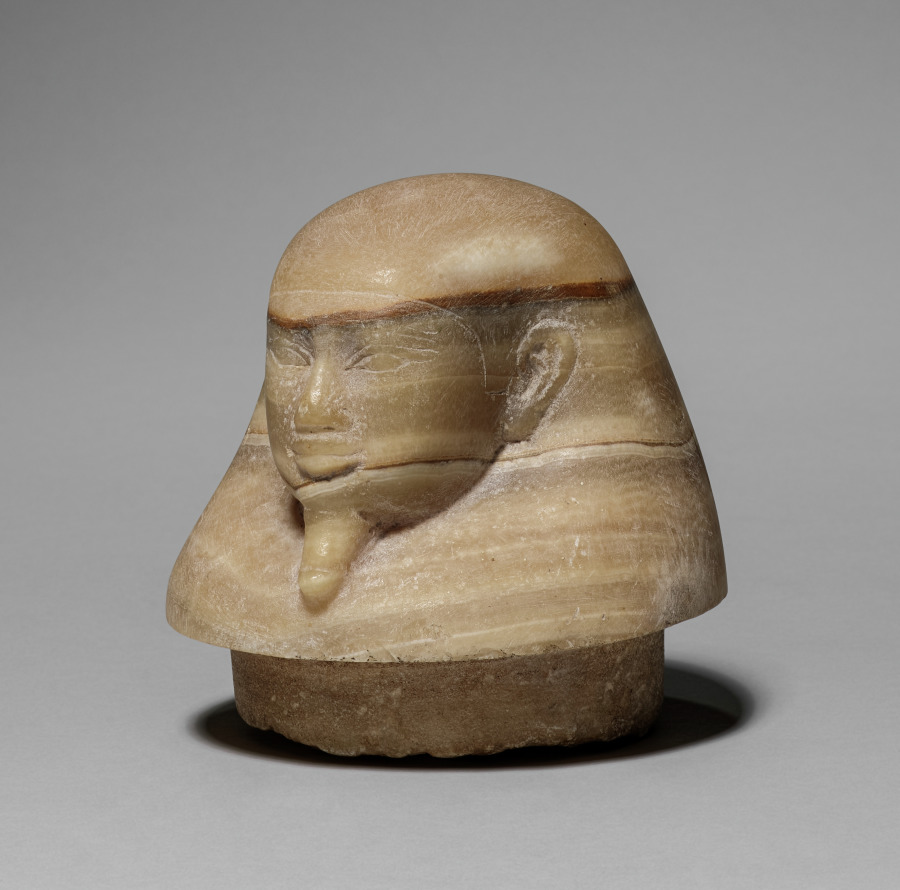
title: Canopic Jar with Man's Head (lid)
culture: Egypt, Late period (715–332 BCE), Dynasty 26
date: 664–525 BCE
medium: travertine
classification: Funerary Equipment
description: In the process of mummification, the liver, lungs, stomach, and intestines were removed, separately embalmed, and stored in specialized jars known as canopic jars (after a sailor in Greek mythology, who died at the town of Canopus in the Nile Delta and was worshipped there in the form of a human-headed jar). Each organ was identified with one of four funerary deities collectively known as the Sons of Horus: the liver with Imsety (man's head), the lungs with Hapy (baboon's head), the stomach with Duamutef (jackal's head), and the intestines with Qebehsenuef (falcon's head). It was their duty to protect the deceased and restore to him his body parts in the hereafter.